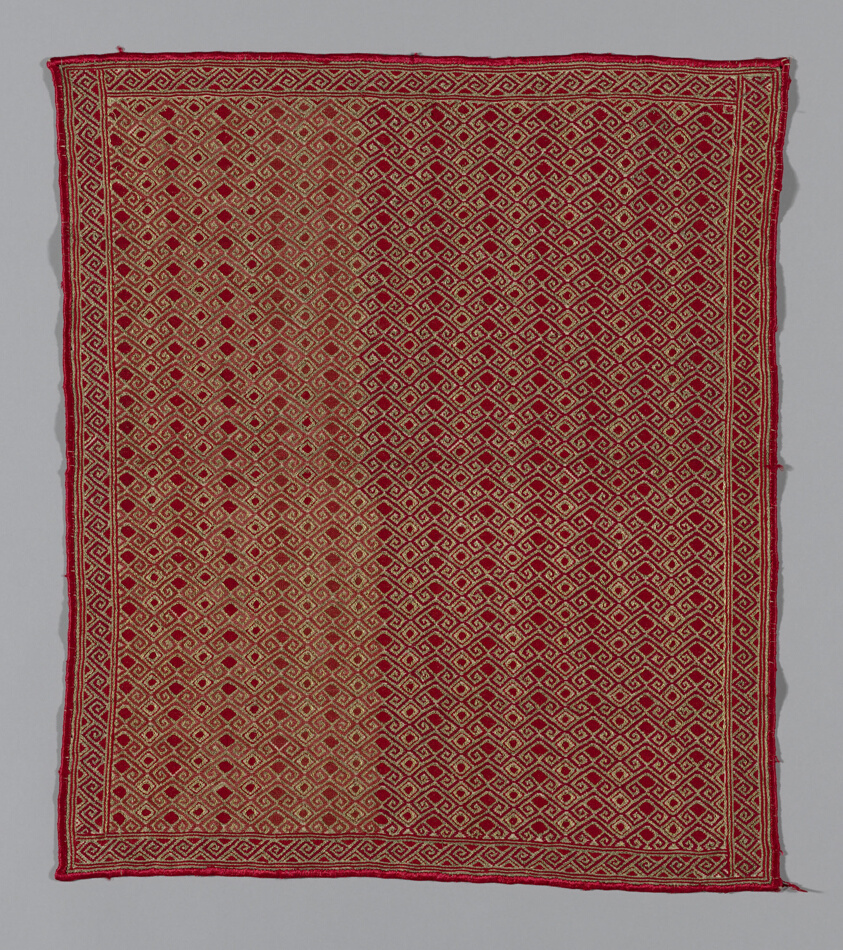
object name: Textile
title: Panel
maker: Romania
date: 19th century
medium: Cloth square, geometric pattern worked in red silk and gold thread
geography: Romania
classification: textile; weaving; needlework (visual works)